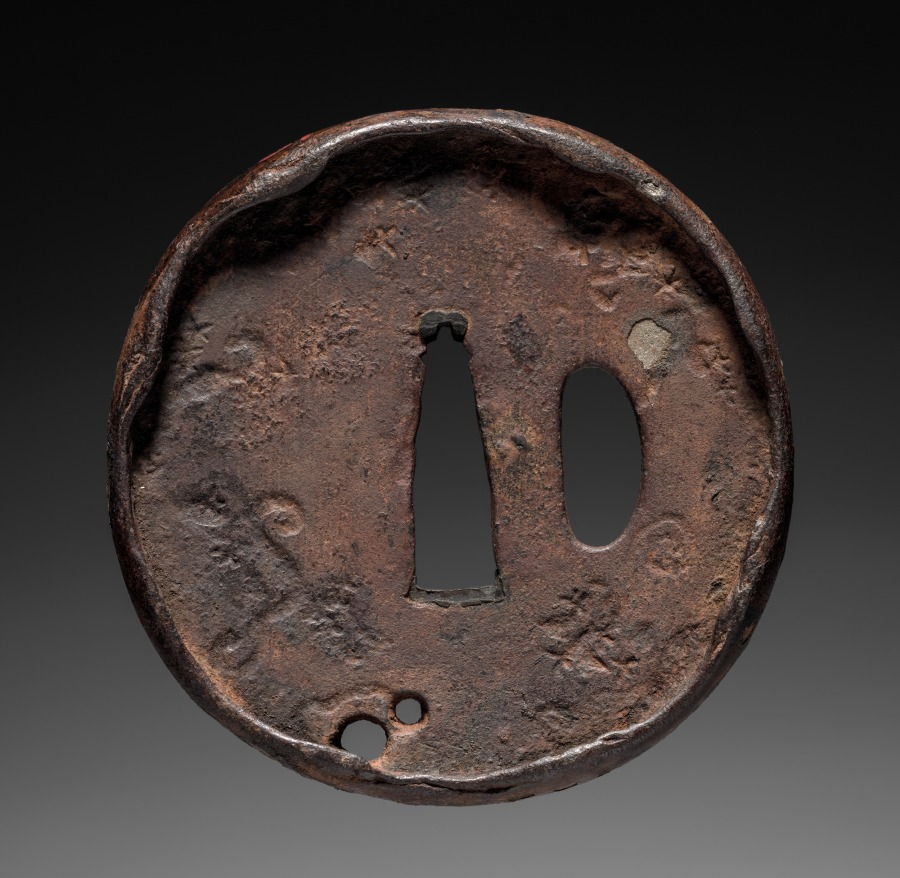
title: Sword Guard (Tsuba)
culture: Japan, possibly Edo period (1615-1868)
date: c. 1615–1868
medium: iron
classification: Arms and Armor